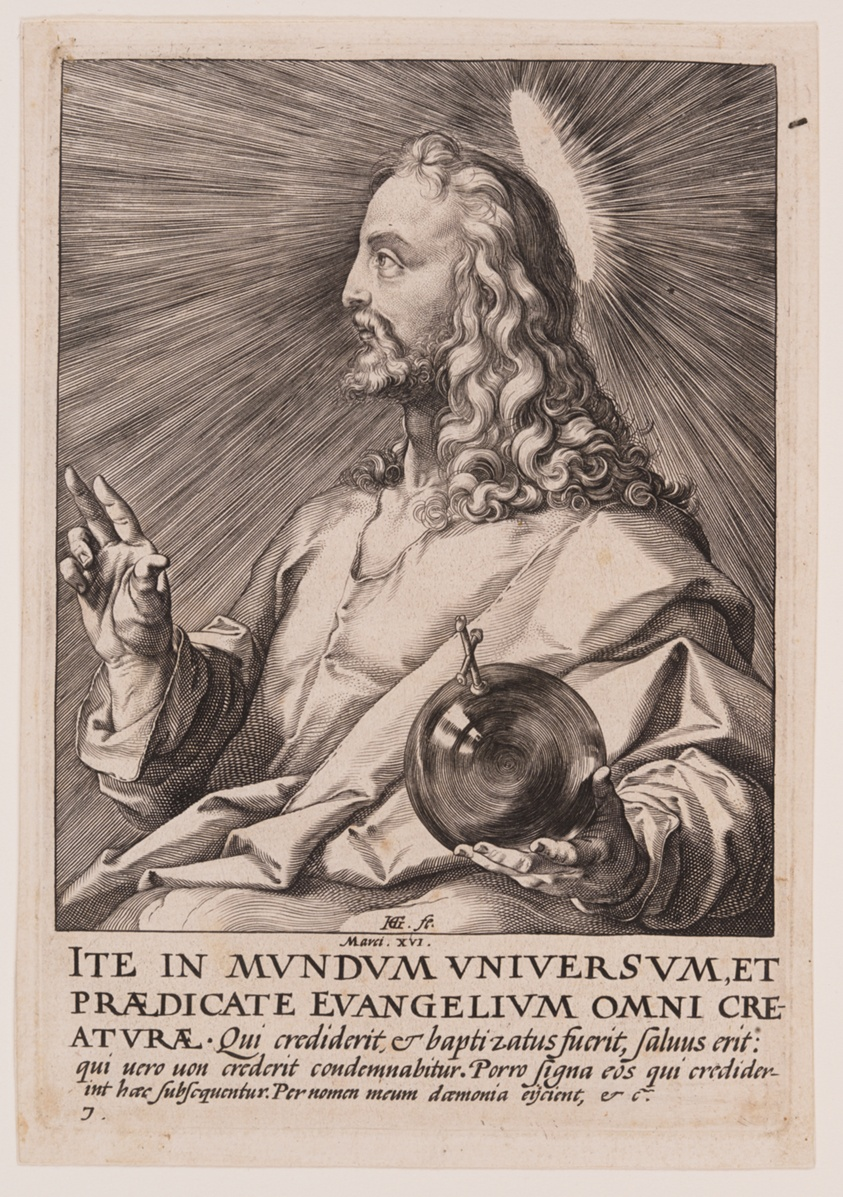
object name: Print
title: Christ, from Christ, the Apostles and St Paul with the Creed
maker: Hendrick Goltzius (Dutch, 1558–1617)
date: 1589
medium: Engraving on ivory laid paper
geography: Netherlands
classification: engraving; paper; print; prints and drawing